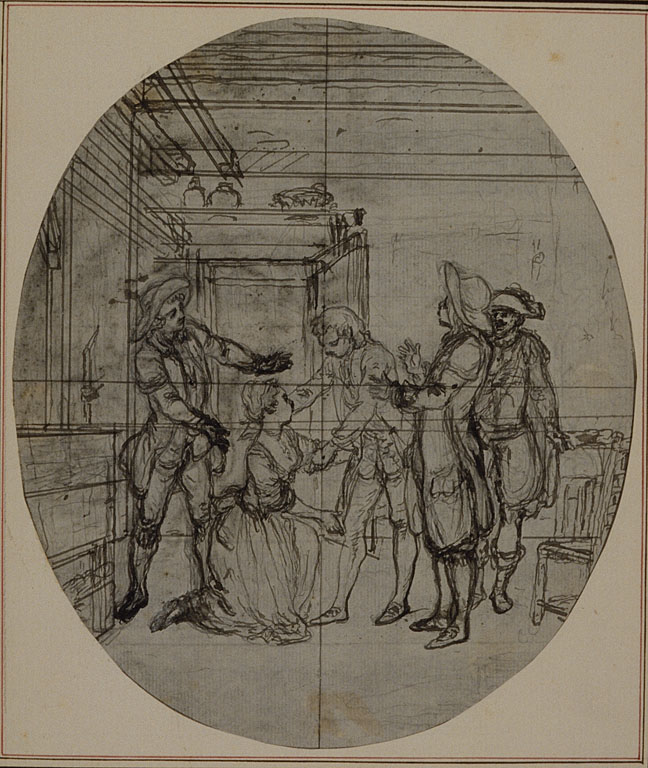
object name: Drawing and Watercolor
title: Study for a second edition, never published, of Colle's "La Partie de Chasse de Henri IV", Act III, Scene 11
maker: Hubert François Gravelot (French, 1699-1773)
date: before 1766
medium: Pen and black ink, with black chalk and traces of graphite, on oval-shaped gray laid paper, incised for transfer and perimeter mounted on ivory laid paper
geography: France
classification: pen and ink drawings; drawings (visual works); prints and drawing